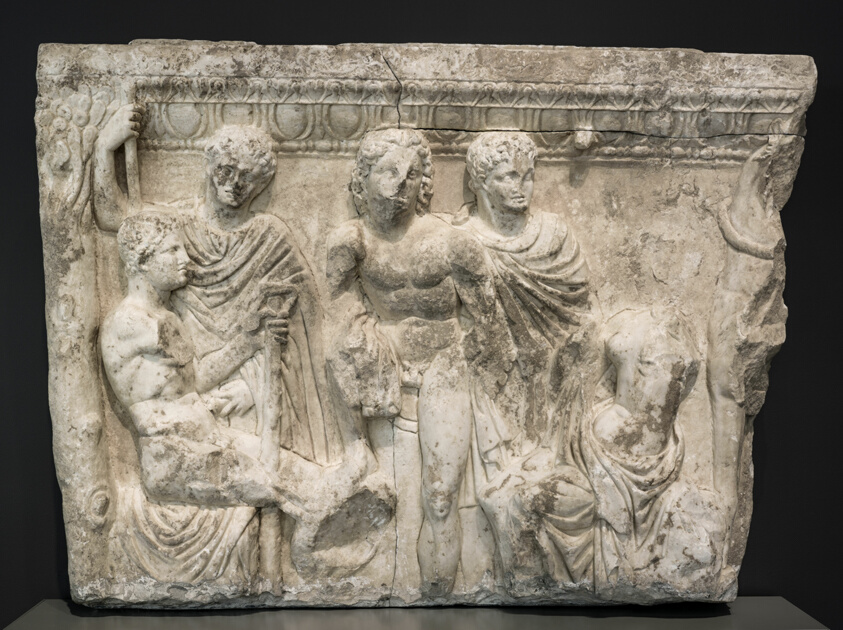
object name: Sculpture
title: Side Panel of a Sarcophagus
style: imperial (roman), ancient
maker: Roman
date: First half of the 3rd century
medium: Marble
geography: Antioch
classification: marble; stone; sculpture; ancient art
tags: mythology, goddesses, gods (deities)